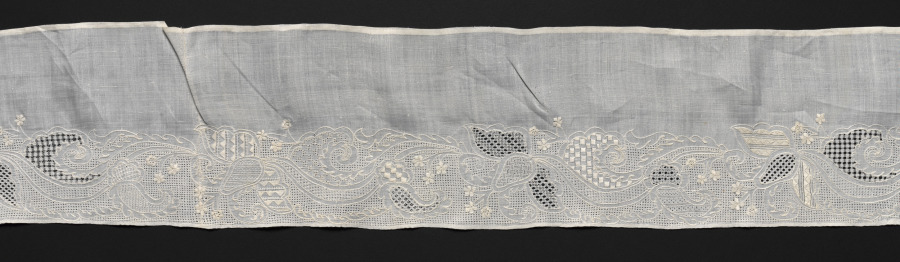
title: Embroidered Band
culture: France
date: 1800s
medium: Plain weave linen: needle lace (cutwork and drawnwork) and embroidery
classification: Embroidery